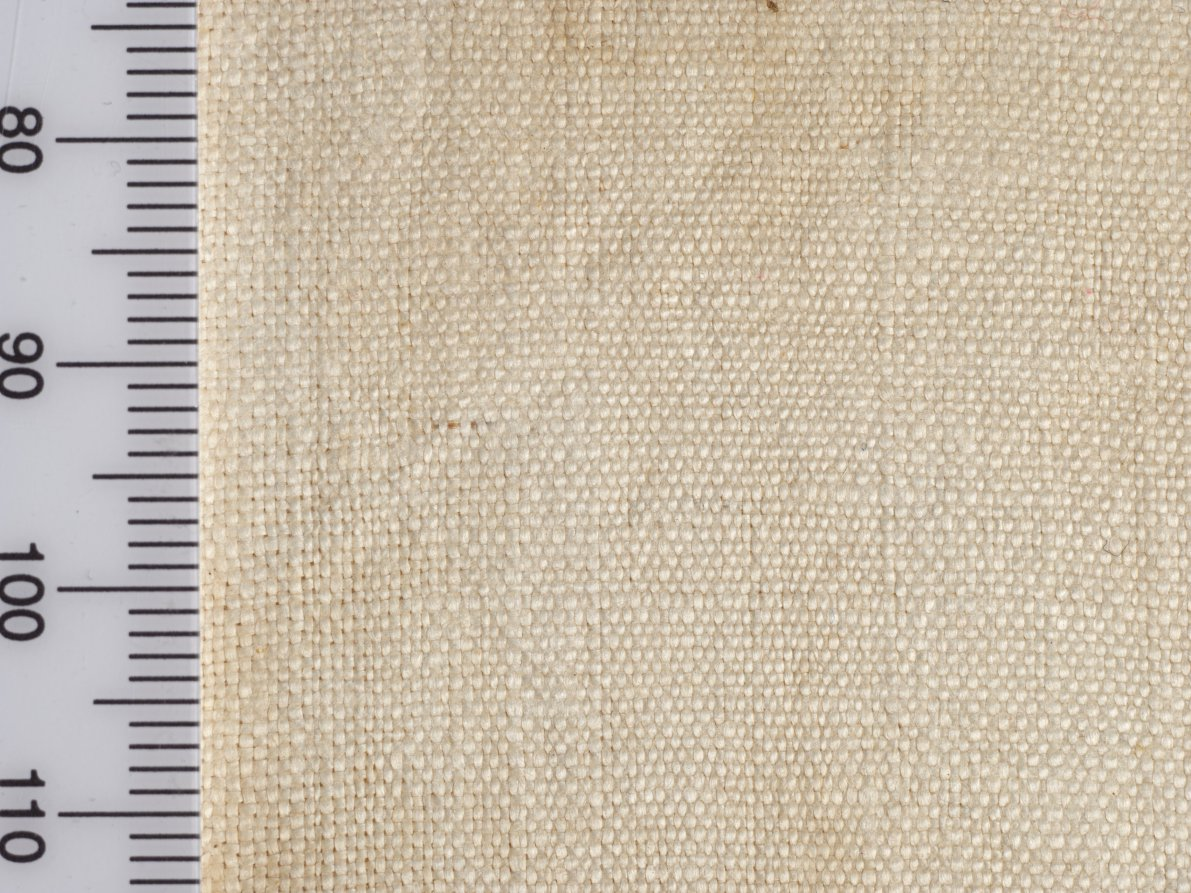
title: Embroidered tiraz with fringe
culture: Egypt, Tunah, Abbasid period, Caliphate of al-Wathiqu, 847-861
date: 847–861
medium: plain weave with embroidery: linen and silk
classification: Embroidery